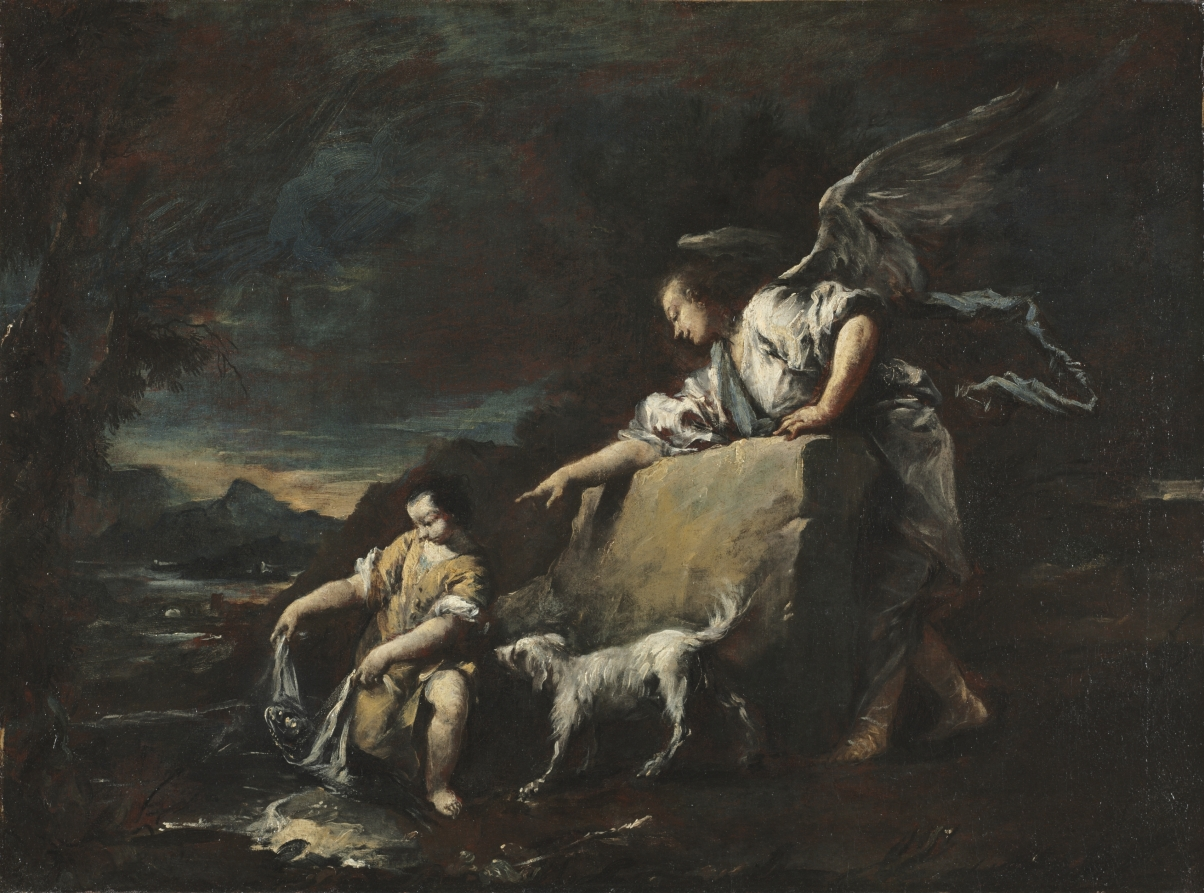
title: Tobias and the Angel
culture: Italy, 18th century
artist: Francesco Guardi (Italian, 1712–1793)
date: 1750s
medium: oil on canvas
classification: Painting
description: This series of paintings predominantly tells the Old Testament story of Abraham and Isaac, and each of the canvases treats the interaction of humans and angels. In three works, angels appear to Abraham. However, the narrative of Tobias and the Angel comes from an entirely different book of the Bible. The blind Tobit sends his son Tobias off to collect a sum of money in the distant town of Media, with the angel Raphael accompanying him in disguise as a human. This particular work depicts Raphael overseeing Tobias catching a fish, which would later be used to cure his father's blindness.